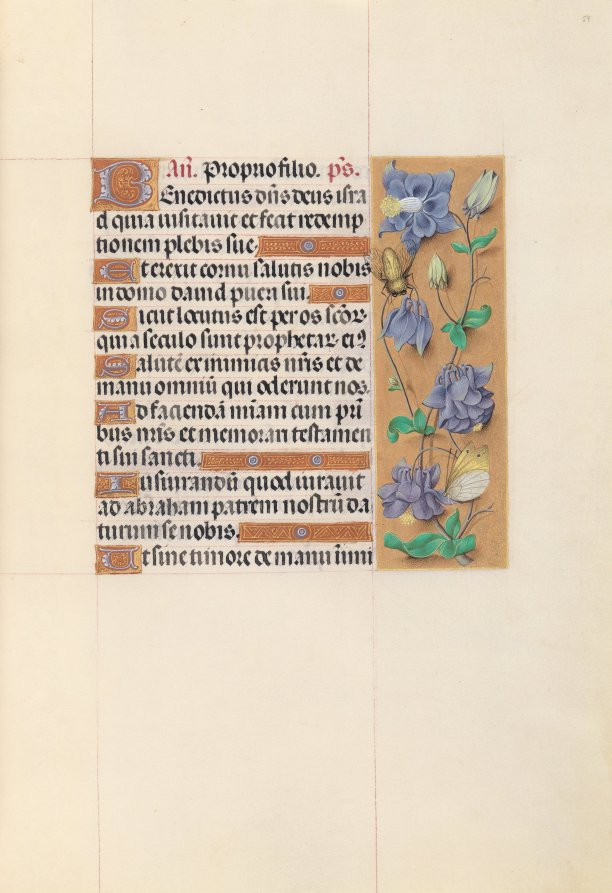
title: Hours of Queen Isabella the Catholic, Queen of Spain: Fol. 59r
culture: Flanders, Ghent and Bruges, late 15th century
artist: Master of the First Prayerbook of Maximillian (Flemish, c. 1444–1519)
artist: and Associates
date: c. 1500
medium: ink, tempera, and gold on vellum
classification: Bound Volume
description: This manuscript was illuminated by a circle of at least five highly organized manuscript painters active in the Flemish cities of Ghent and Bruges. The principal illuminator was Alexander Bening, who painted the majority of the book's miniatures. Manuscripts produced by this circle of artists are renowned for the decoration of their borders, which typically feature a rich variety of realistically-painted flowers, birds, and butterflies. This prayer book, called a book of hours, was intended not for a cleric, but for the private devotions of a lay person-in this case, Isabella the Catholic, Queen of Spain (1451-1504). Isabella's coat of arms embellishes the book's frontispiece. It is unlikely that the book was commissioned by the Queen herself; rather, she probably received it as a diplomatic gift from someone courting her patronage, perhaps Cardinal Francisco Jimenez de Cisneros. A Franciscan friar, Jimenez was dependent upon Isabella for his advancement, first to the post of Queen's confessor in 1492, and then to Archbishop of Toledo in 1495.